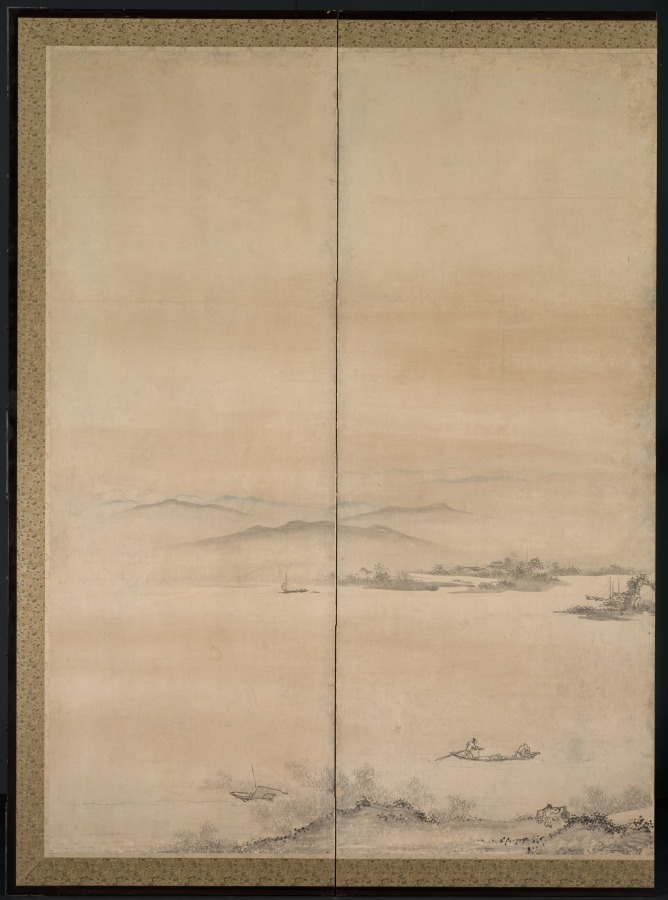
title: Chinese Landscape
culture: Japan, Muromachi period (1392–1573)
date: 1500s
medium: One of a pair of six-fold screens; ink and slight color on paper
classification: Painting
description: In a panorama of mountains and expanses of water, three gentlemen have assembled by moonlight to enjoy one another’s company away from a bustling village. An influx of ink paintings from China in both album and scroll formats beginning in the late 1200s inspired Japanese artists to create landscapes based upon Chinese prototypes. Later, Japanese painters adapted the imagery to the larger format of folding screens, which were used to define spaces in large rooms.